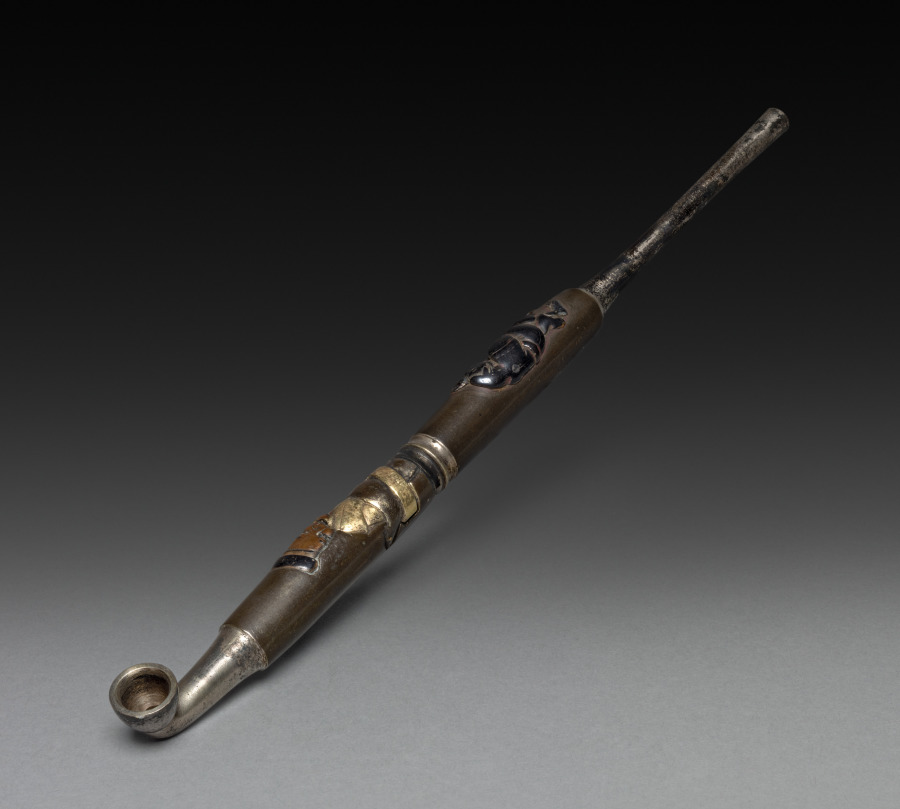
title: Tobacco Pipe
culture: Japan, Edo period (1615–1868)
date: 1700s to mid-1800s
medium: bamboo and metal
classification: Miscellaneous